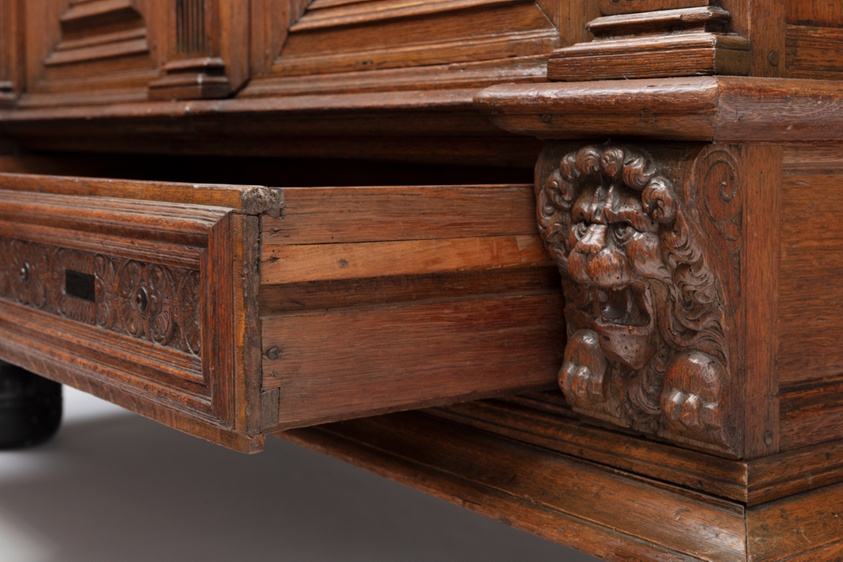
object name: Furniture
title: Linen Cupboard (Kast)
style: Baroque, Mannerism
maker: The Netherlands, probably Amsterdam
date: 1630/50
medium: Oak, pearwood, hardwood, paint, iron, and brass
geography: Netherlands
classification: furniture; decorative arts; functional object; furnishings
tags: lions, animals, architecture